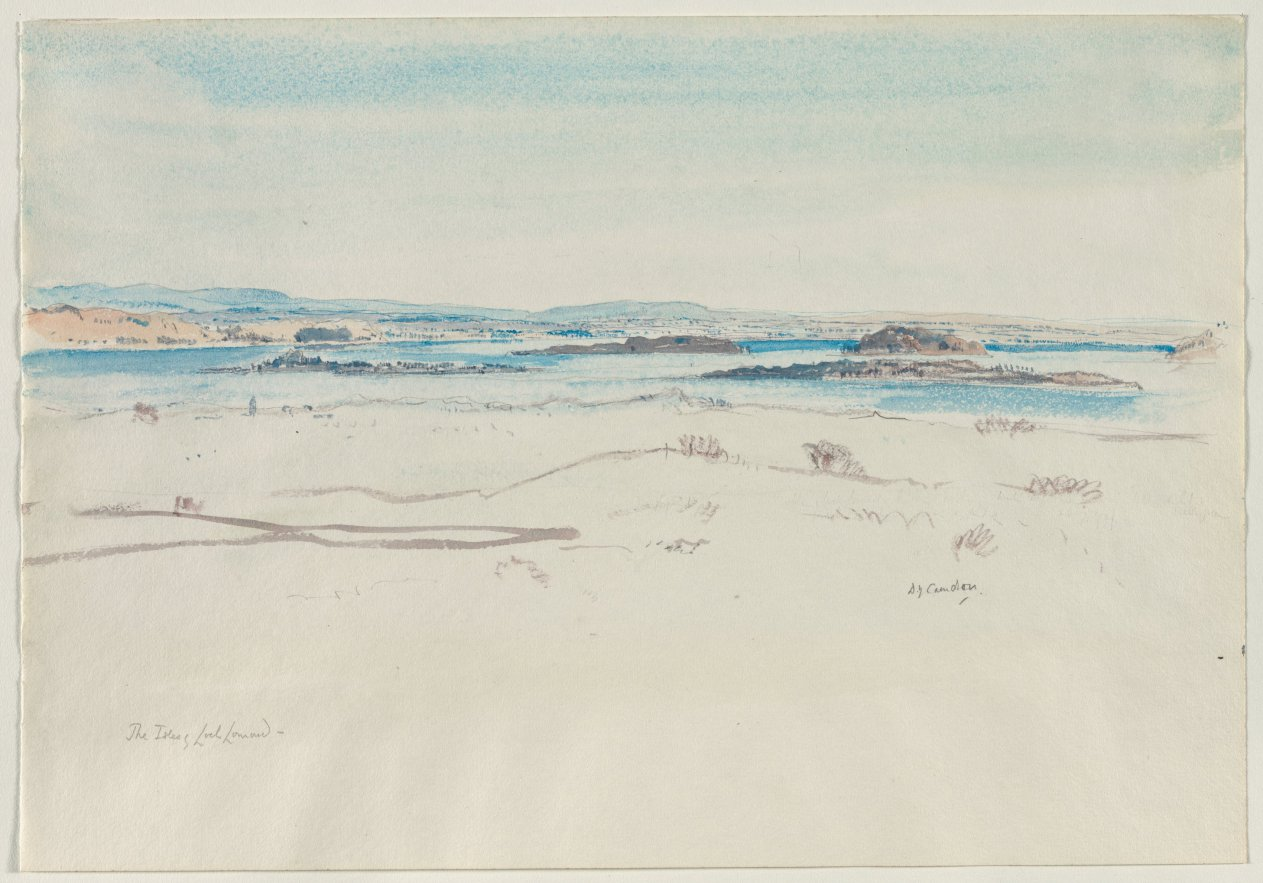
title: Isles of Loch Lomond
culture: England, 19th-20th century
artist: David Young Cameron (British, 1865–1945)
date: c. 1885–1938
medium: watercolor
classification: Drawing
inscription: In ink, lower right: "D.Y. Cameron"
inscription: in ink, lower lower left: "The Isles of Loch Lomand"